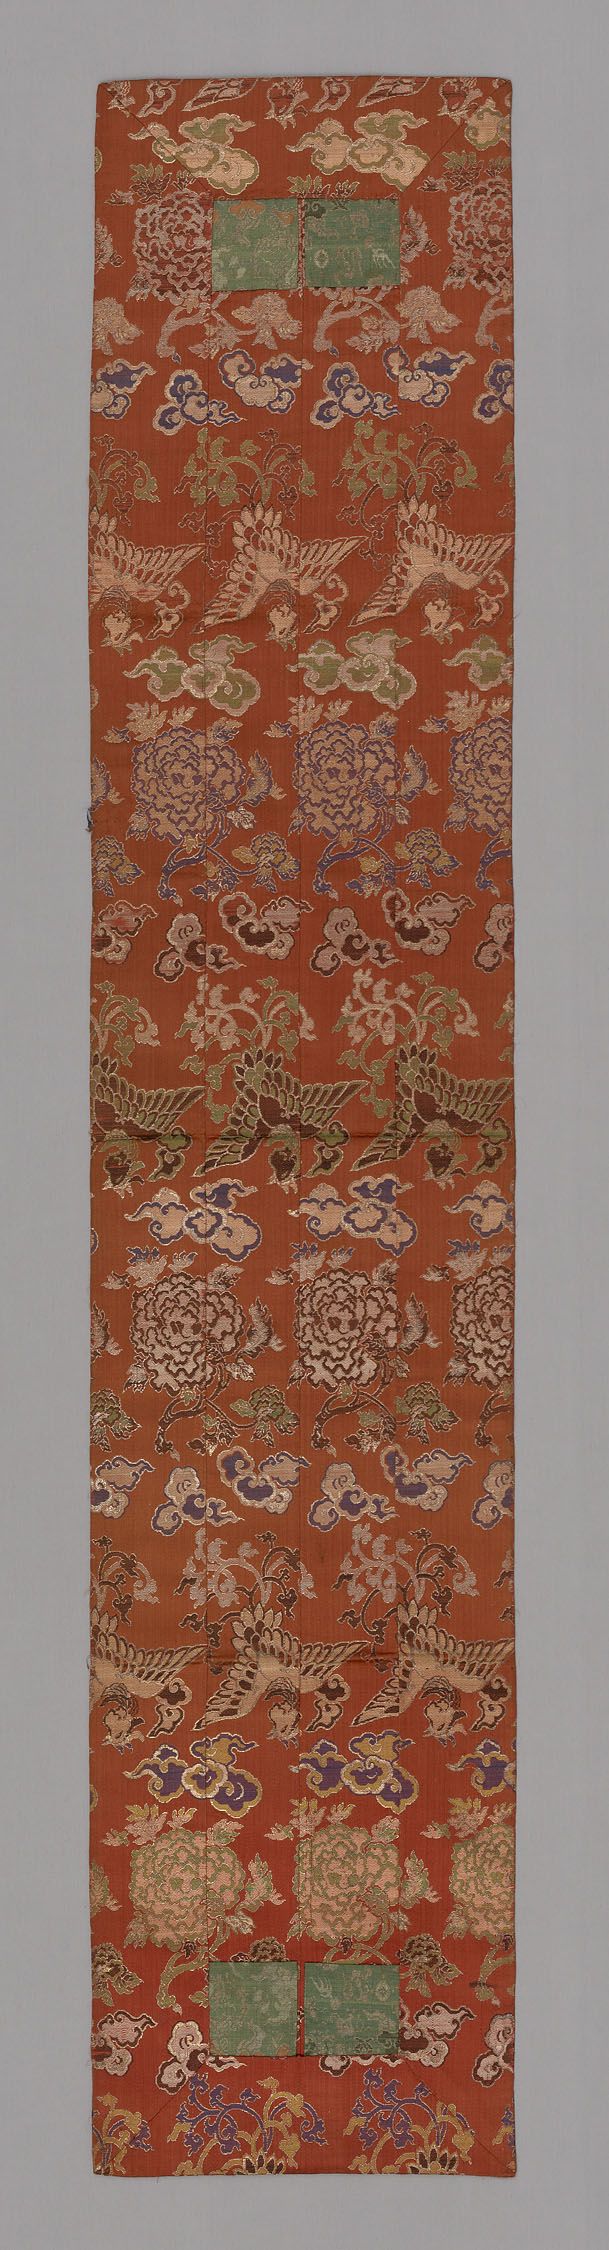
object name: Textile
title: Ôhi (Stole)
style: late edo, Japanism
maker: Japan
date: late Edo period (1789–1868), 1801/25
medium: Silk compound weave with ground of soft red loosely woven satin.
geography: Japan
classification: textile; weaving; costume; liturgical - buddhist